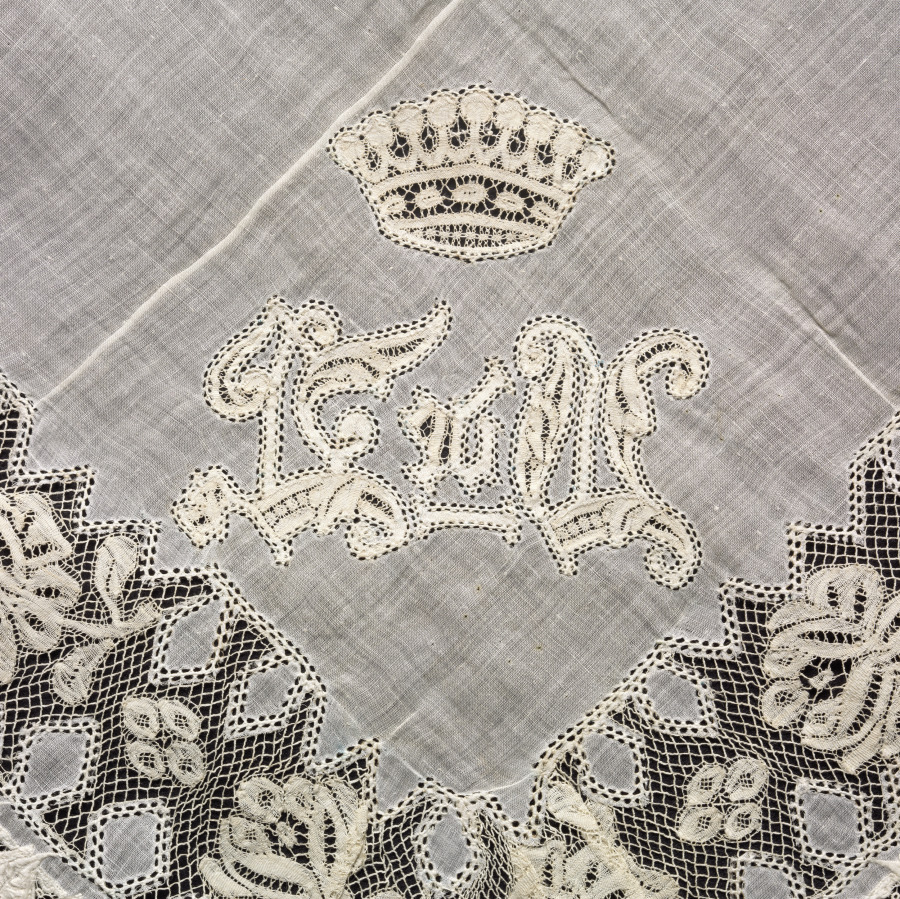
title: Lace Handkerchief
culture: France or Flanders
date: 1800s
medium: Plain weave linen center: bobbin lace (Valenciennes) insertion and embroidered border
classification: Lace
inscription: "V de L."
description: In the lower corner of this lace handkerchief, the letters "V" and "L" with a nine-point coronet above them, have been created in lace and inset into the plain weave linen.